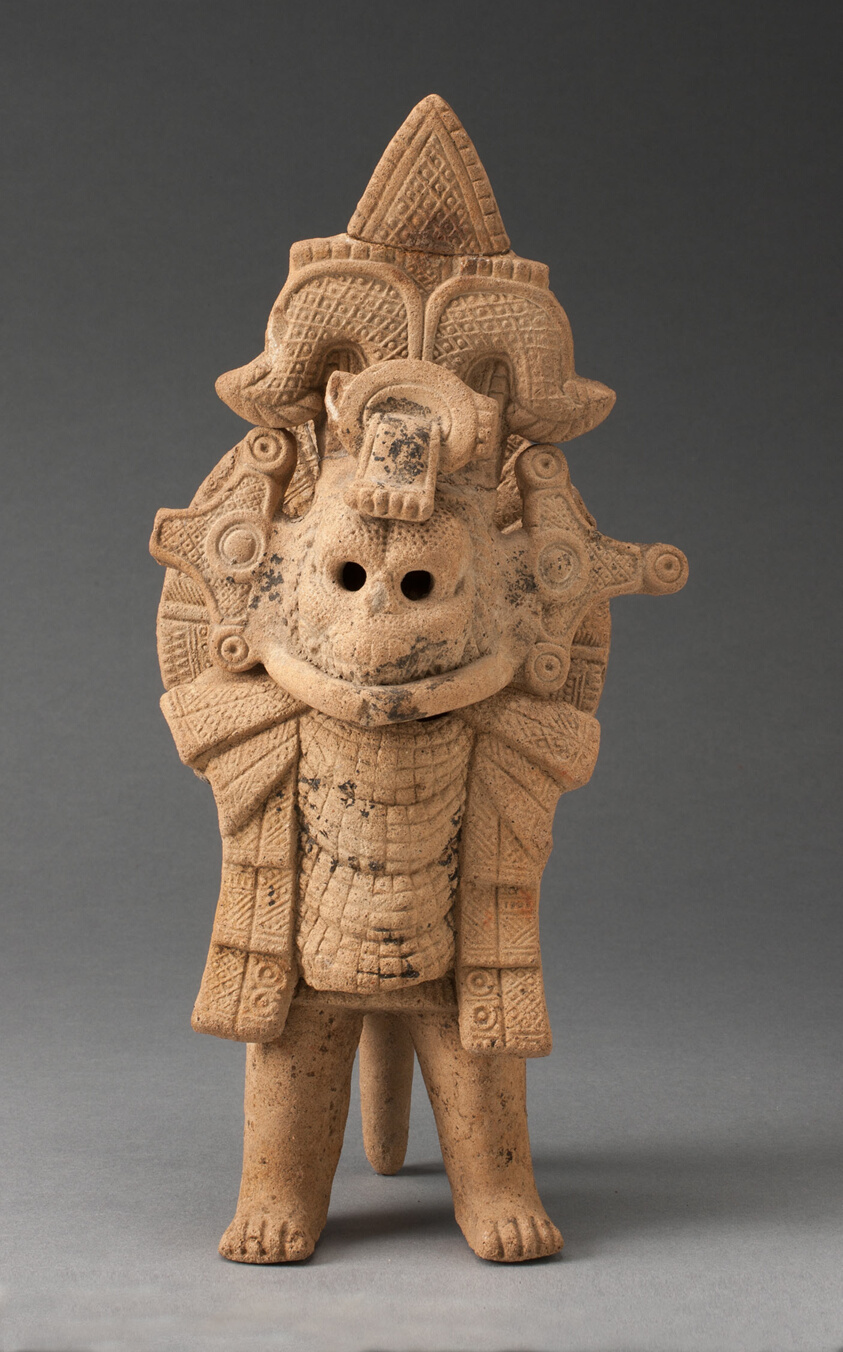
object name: Sculpture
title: Figure of a Standing Warrior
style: Nōpiloa, Arts of the Americas, veracruz, mesoamerican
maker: Nopiloa (South-central Veracruz, Mexico)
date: 600–900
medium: Ceramic and pigment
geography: Veracruz state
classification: earthenware; art of the americas; ceramics; sculpture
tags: people